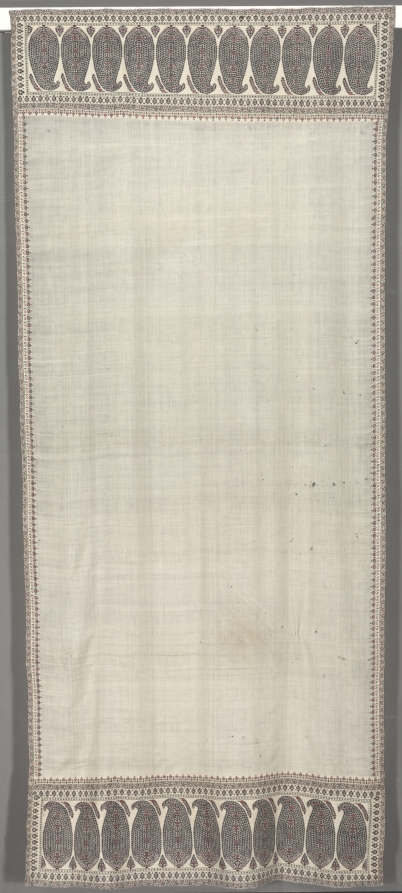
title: Long Shawl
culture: India, Kashmir, 19th century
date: c. 1812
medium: 2/2 twill tapestry weave, double interlocked; wool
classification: Textile